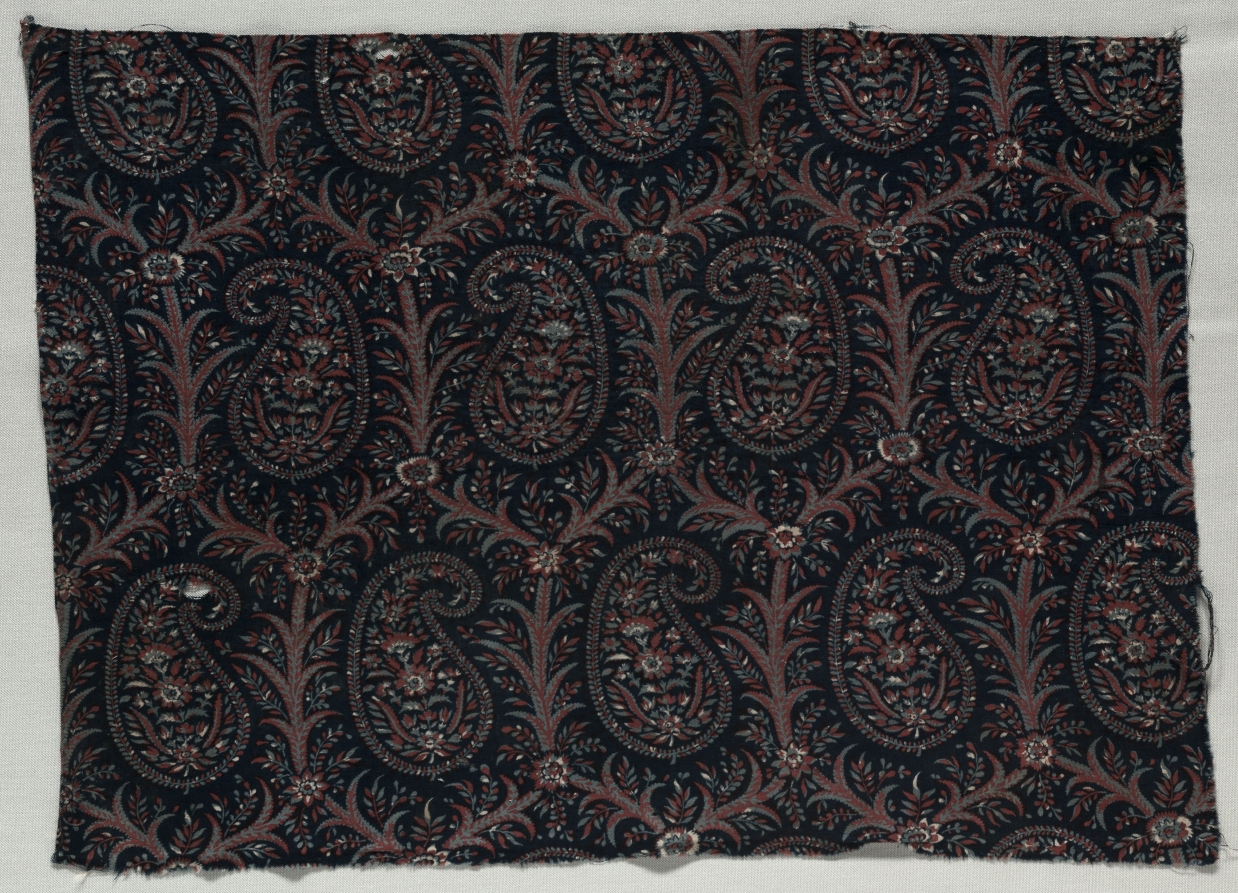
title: Textile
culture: England, early 20th century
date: early 1900s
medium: cotton; printed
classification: Textile